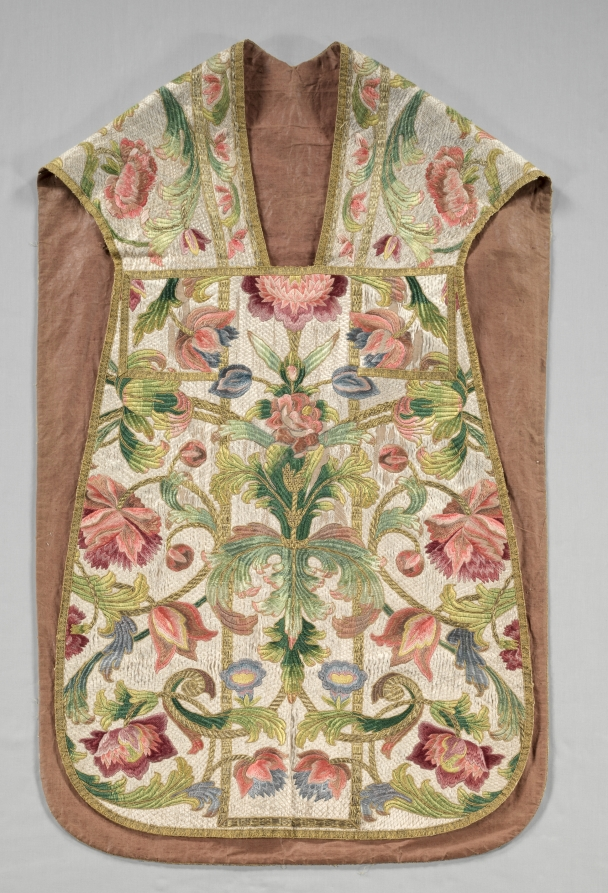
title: Chasuble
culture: Italy, 18th century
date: 1700s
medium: embroidery, silk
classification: Embroidery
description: The silk thread in this chasuble, a liturgical vestment worn over an alb, is exceptionally lustrous. The lavish allover floral and foliate decoration in pastel shades on golden stems and the ivory ground were embroidered with shiny floss silk—soft silk filaments that form loosely twisted instead of tightly twisted thread. The floss silk is crossed with parallel lines of thread in matching colors that are secured by a third thread from underneath, called laid and couched-work embroidery. The dazzling effect illustrates skilled workmanship.